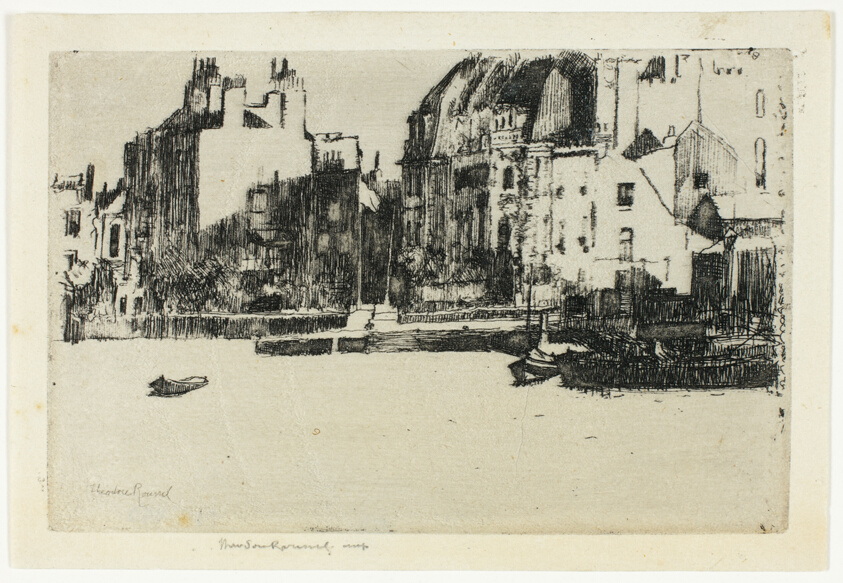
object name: Print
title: Chelsea Palaces (Black and White Version)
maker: Theodore Roussel (French, worked in England, 1847-1926)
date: 1888–89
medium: Etching in black on cream wove paper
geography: England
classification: etching; paper; print; prints and drawing